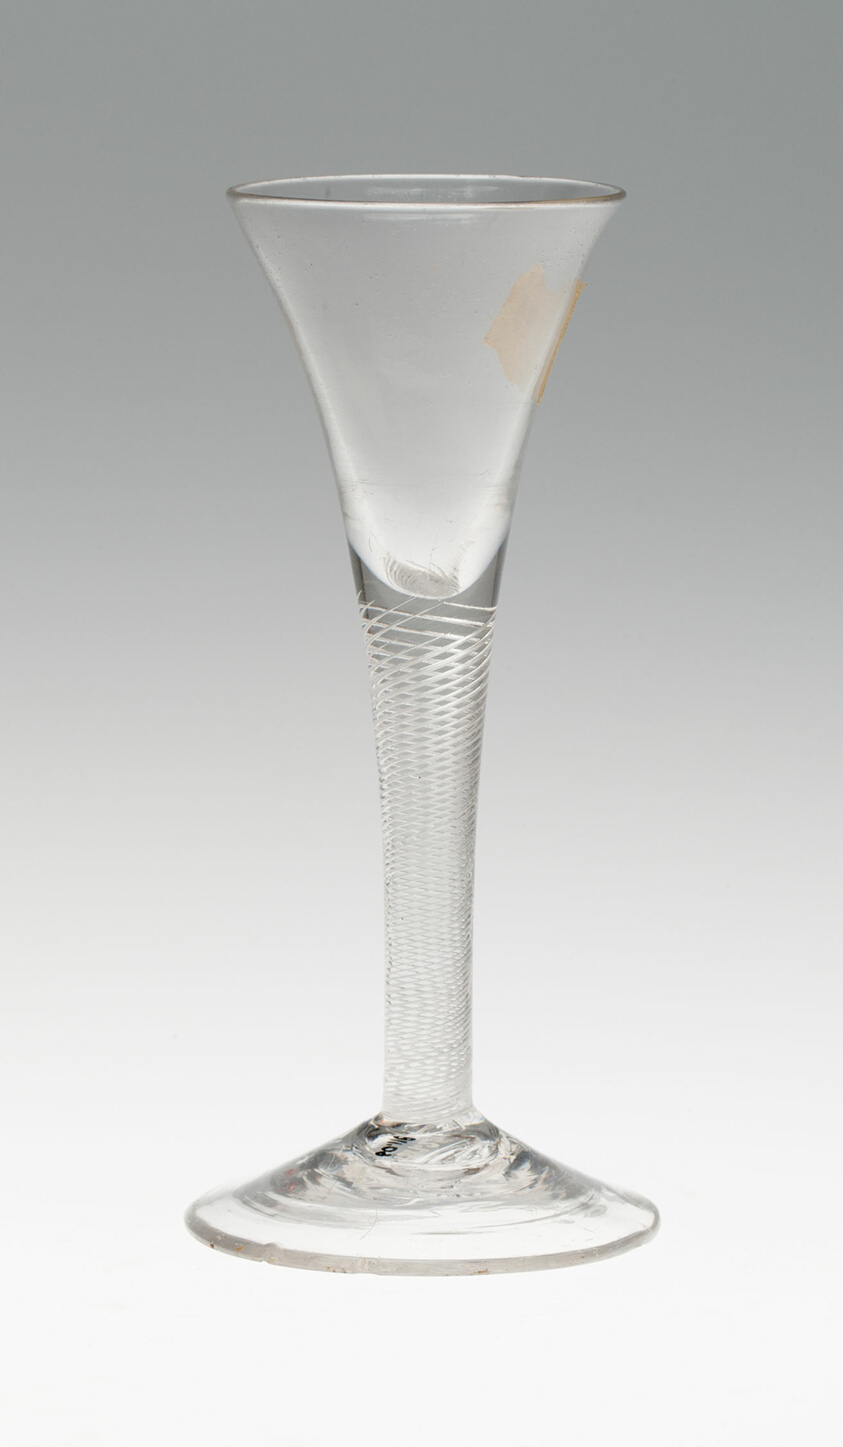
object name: Glass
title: Wine Glass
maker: England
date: c. 1750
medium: Glass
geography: England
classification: drinking vessel; glass; european decorative arts